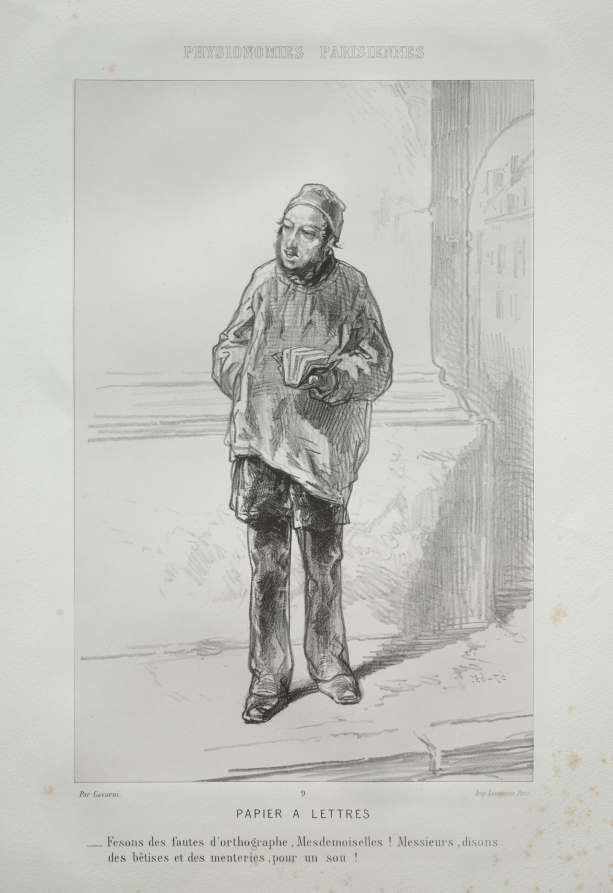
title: Papier à Lettres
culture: France, 19th century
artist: Paul Gavarni (French, 1804–1866)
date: c. 1857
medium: lithograph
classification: Print